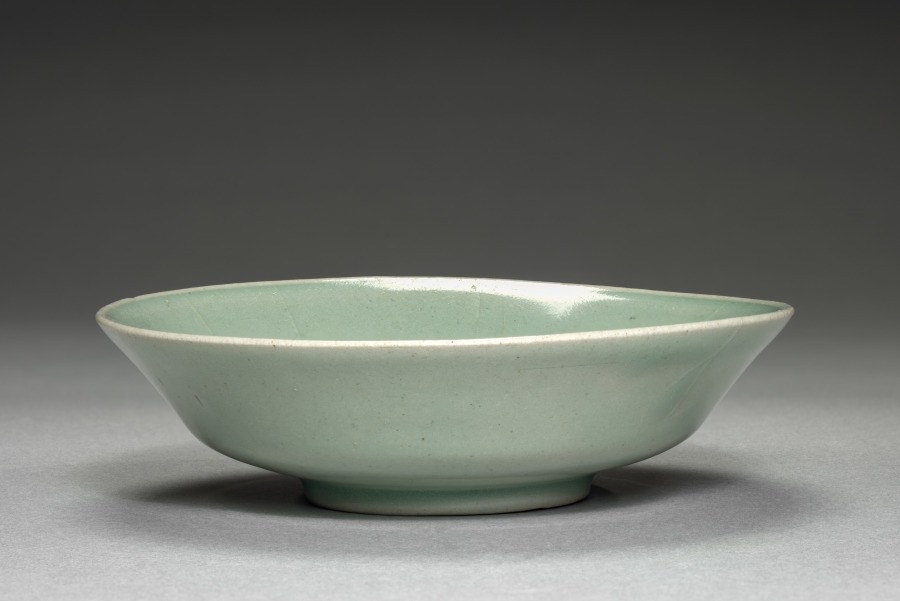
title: Dish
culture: Korea, Goryeo dynasty (918–1392)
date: 1100s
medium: glazed porcelain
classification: Ceramic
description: Celadon wares used for everyday such as this dish were among the most common burial objects in tombs during the Goryeo period (918–1392). Furnishing tombs with an elaborate assemblage of objects was believed to honor and comfort the newly dead. Generally, Goryeo tombs were left untouched until the late 1800s. During the colonial period (1910–45), however, Japanese archaeologists competitively excavated the tombs located in Kaeseong, the former capital of the Goryeo period, and soon became available for Japanese and Western collectors.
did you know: The pale bluish glaze indicates that this dish was created in the 1100s, when the production of celadon reached its technical peak.